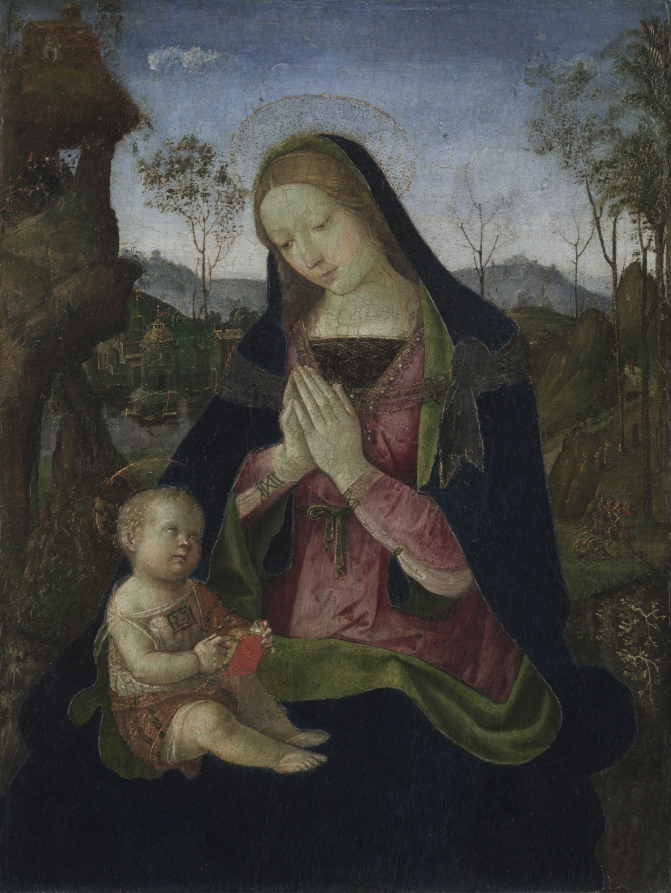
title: Virgin and Child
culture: Italy, late 15th Century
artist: Pintoricchio (Italian, c. 1454–1513)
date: c. 1490–1500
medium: tempera and oil on wood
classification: Painting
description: Bernardino di Betto, called Pinturicchio, is said to have acquired his nickname ("little painter") because of his small stature, and used it to sign some of his paintings. Born in Perugia, the provincial capital of Umbria, he trained under local artists, eventually becoming a paid assistant of the painter Perugino. He is known to have assisted Perugino on his frescoes in the Sistine Chapel and eventually established his own reputation as a respected artist. Many of his commissions were for churches and wealthy families in Umbria and elsewhere. Though the source of this painting is unknown, it was likely produced for a home or private chapel.